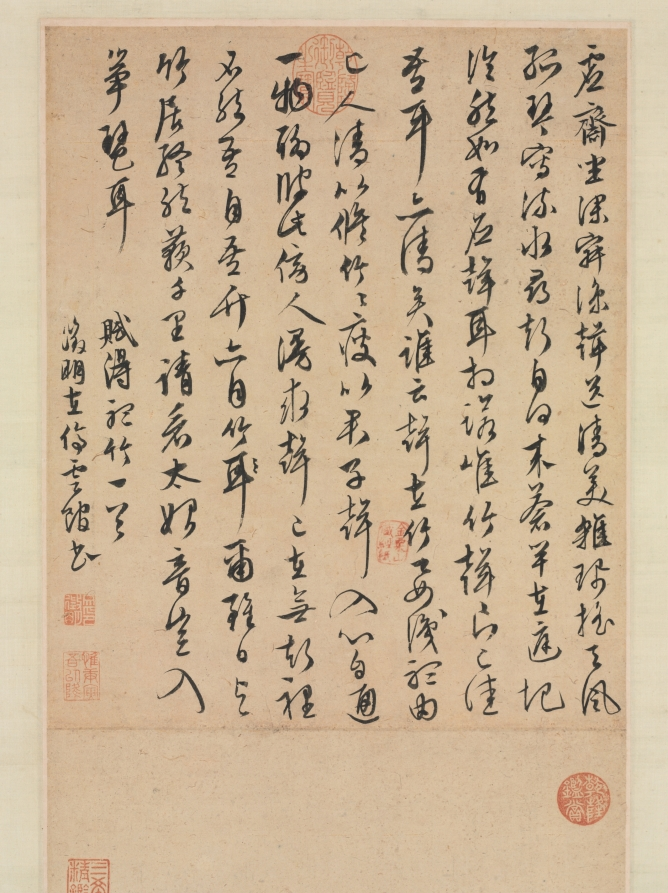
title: Listening to the Bamboo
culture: China, Ming dynasty (1368–1644)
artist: imitator of Wen Zhengming (Chinese, 1470–1559)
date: late 1400s-1500s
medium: hanging scroll, ink on sutra paper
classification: Painting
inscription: Artist's inscription, signature, and 2 seals on the separate sheet of paper above the painting: In the empty studio sitting in deep loneliness;/ Like cool sound sending pure beauty,/ Or pendants swinging in the wind,/ Or a solitary qin suggesting running water./ Where is that sound from?/ The green poles in the courtyard,/ Clear and light like an echo,/ The sound and ears are in tune./ The sound of bamboo now very beautiful;/ My ears are also clear./ Who says the sound is in the bamboo?/ To know it depends on oneself./ A noble person is like a tall bamboo;/ A thin bamboo is like the noble man./ When the sound enters, the mind responds,/ Only one thing but artificially separated./ A bystander searching for the sound,/ But the sound can only be found in silence./ Otherwise I am still I,/ Bamboo is still bamboo./ Even if I live with bamboo every day,/ Still the music will be a thousand miles away./ Look at sound's most primeval source:/ Did it enter a zither or a lute? Composing a poem on Listening to the Bamboo. Written by Zhengming at the Ting yun guan. Wen Zhengming [2 seals] Wen Zhengming yin 文徵明印; Wei geng yin wu yi jiang 惟庚寅吾以降.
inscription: [印] 文徵明印; 惟庚寅吾以降.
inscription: 5 seals of the Qianlong emperor (r. 1736-95)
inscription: [印] 金粟山藏經紙